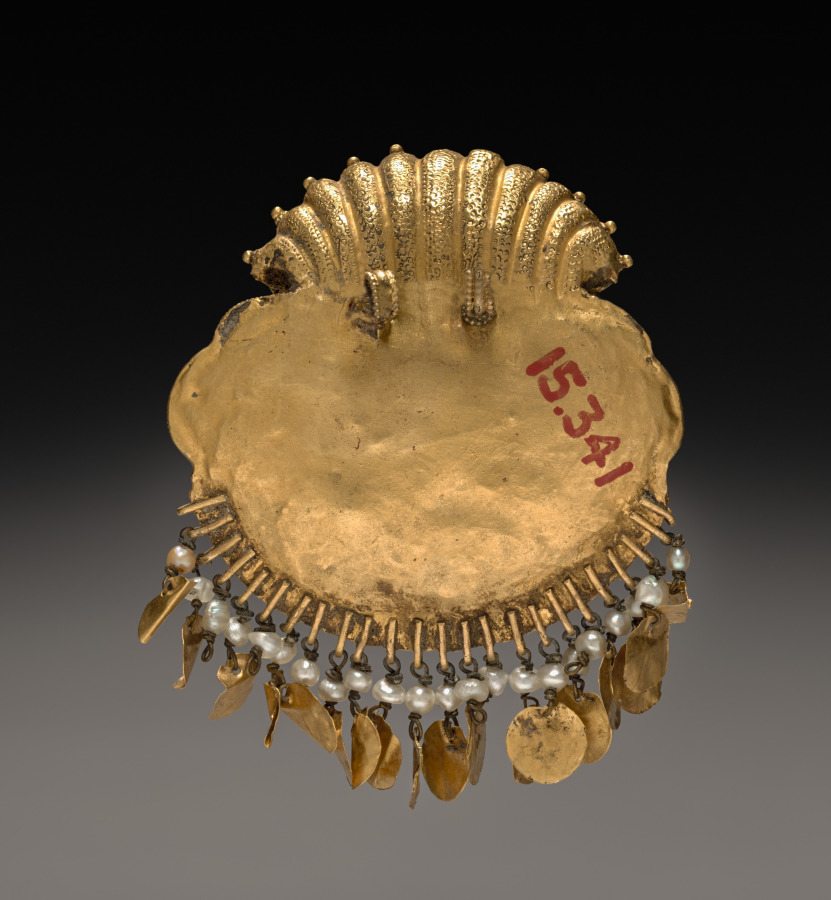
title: Pendant with Two-Armed Blue Deity on a Lotus with Nagas (serpent divinities)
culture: Nepal, Kathmandu Valley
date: 1600s or 1700s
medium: gold with lapis lazuli and turquoise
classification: Jewelry